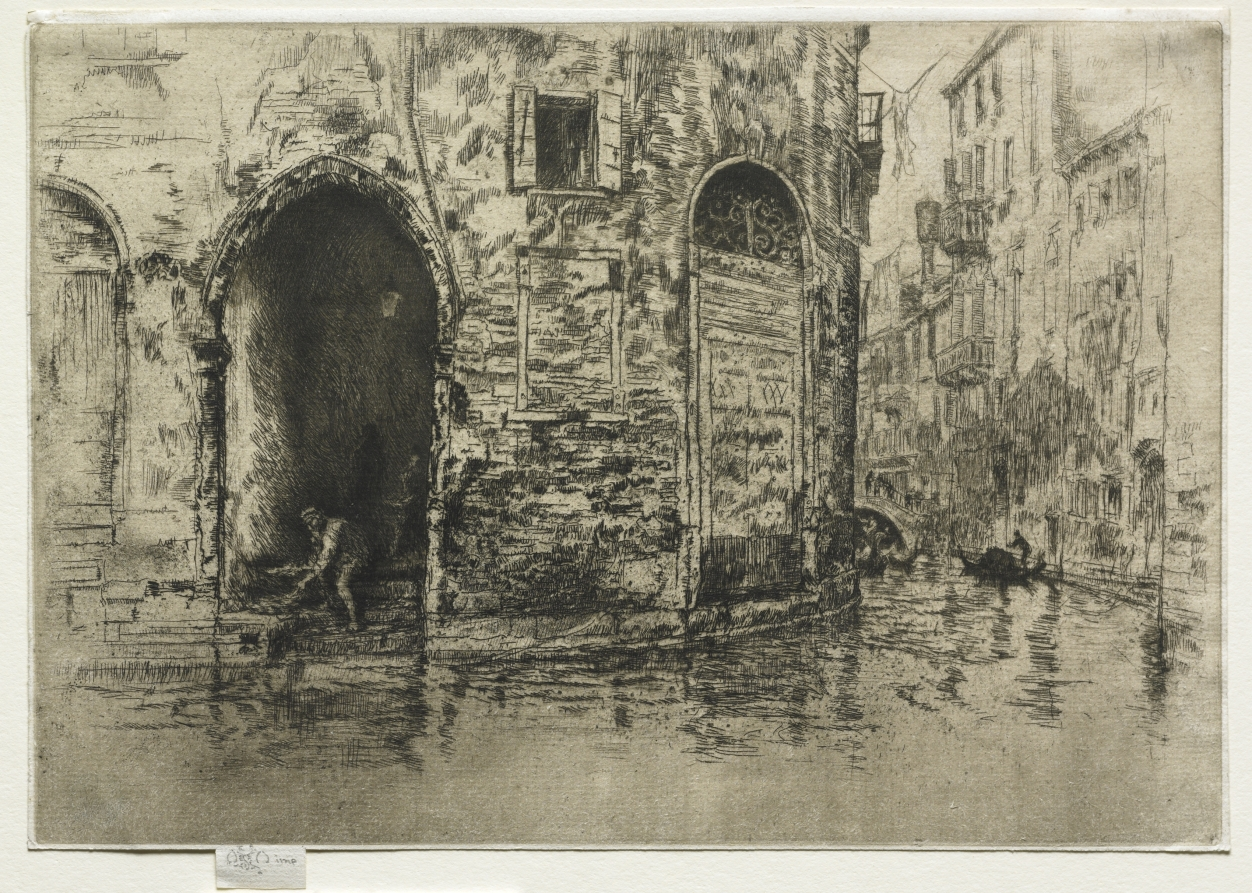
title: Two Doorways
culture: America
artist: James McNeill Whistler (American, 1834–1903)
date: 1880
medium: etching and drypoint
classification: Print